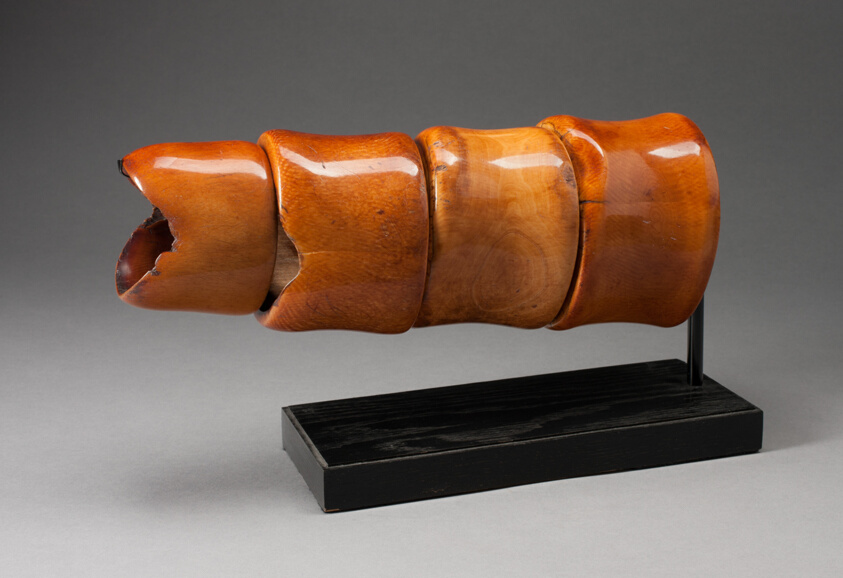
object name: Costume and Accessories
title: Four Bracelets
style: igbo, Arts of Africa, african Art, Coastal West Africa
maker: Igbo; Nigeria; Coastal West Africa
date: Probably 19th century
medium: Ivory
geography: Nigeria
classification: bracelet (jewelry); ivory; jewelry; arts of Africa; african art; costume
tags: costume